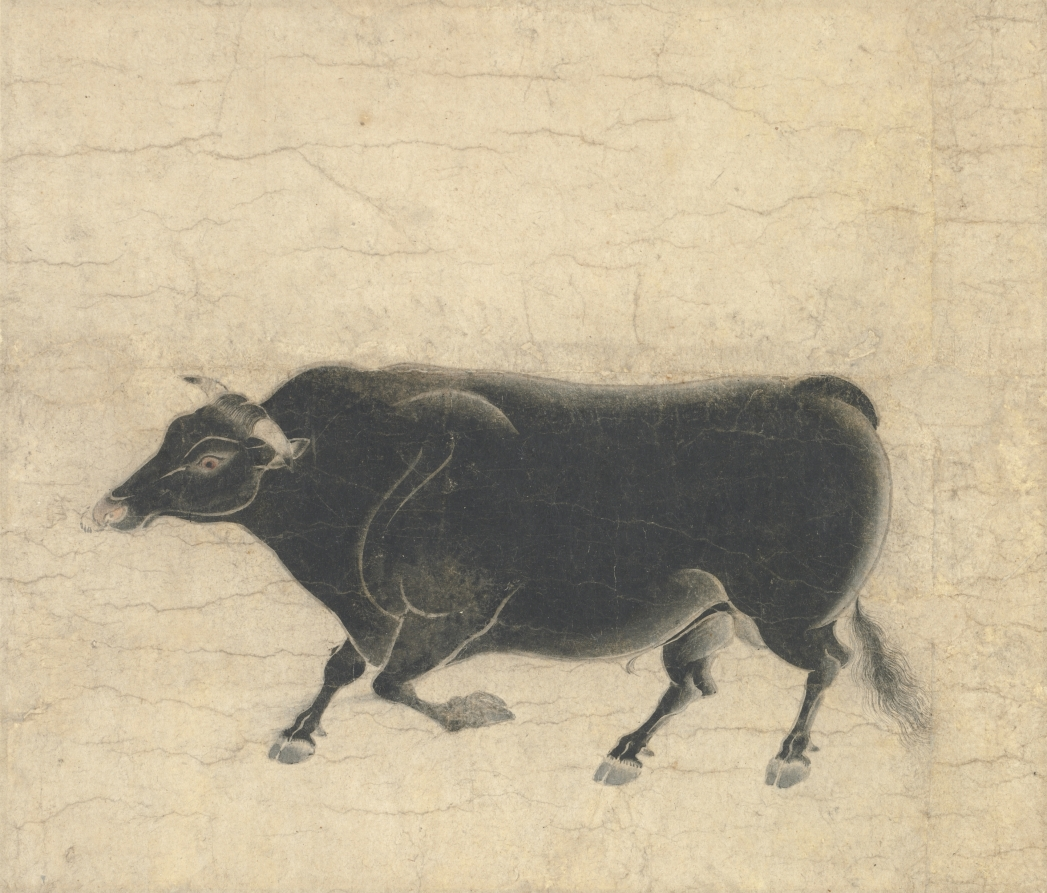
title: Swift Bull from the Ten Swift Bulls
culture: Japan, Kamakura period (1185–1333)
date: late 1200s–early 1300s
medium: section of a handscroll mounted as a hanging scroll; ink and slight color on paper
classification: Painting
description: Across the world, animals once played a much larger role in the transportation of the elite. Members of Japan’s imperial court traveled in vehicles pulled by oxen until the late 1400s, when oxcarts were restricted to ceremonial use. One sign of the past importance of the ox as a status symbol survives in this fragment from a scroll of portraits of 10 speedy bulls. The painter layered washes containing differing ratios of black ink to water to create a three-dimensional effect.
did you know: We know the original scroll had ten bulls because a copy of the complete scroll exists.